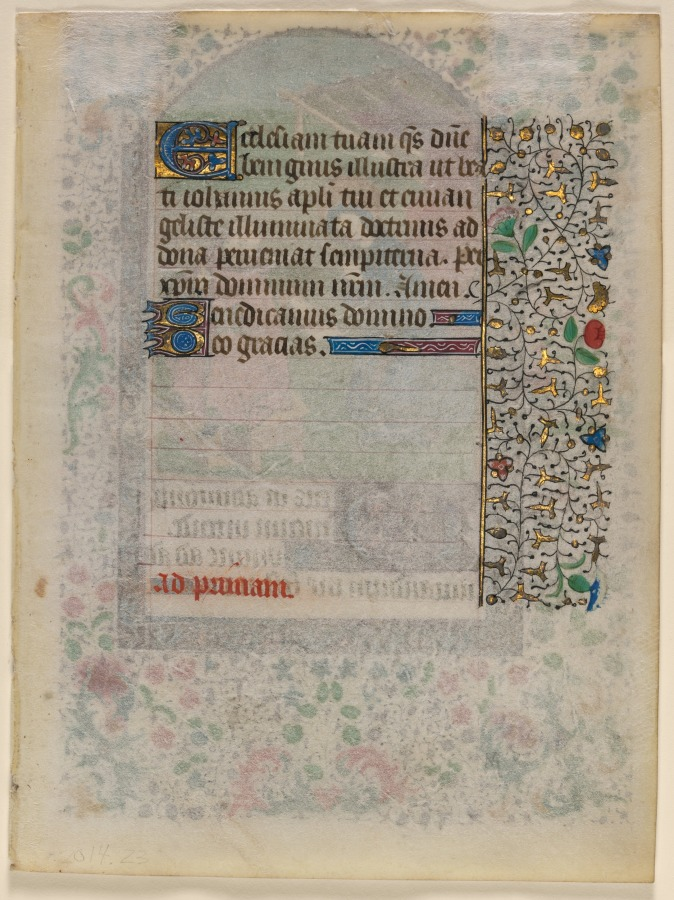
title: Leaf from a Book of Hours: The Nativity (recto) and Text (verso)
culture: Northeastern France, 15th century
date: c. 1430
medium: ink, tempera, and gold on vellum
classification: Manuscript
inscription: Deus in adiutorium meum intende. Domine, ad adiuvandum me festina.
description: Representing God's entry into the world, the Nativity remains one of medieval painting's most poignant Christian images. In the Gospels, only Matthew and Luke directly described this event. Perhaps the brevity and absence of detail in these texts allowed artists to devote so much creativity to amplifying the Christmas story. This miniature's simplicity makes it compelling. Only the three principals—Mary, Joseph, and the newly born Christ child—appear in the scene. The Virgin kneels before an elegant canopied bed made sumptuous by a richly embroidered textile, which stands in contrast to the nearby rustic fence and receding landscape. This scene probably follows the mystical visions of Saint Bridget of Sweden who visited Bethlehem in 1370, and whose written accounts circulated widely after her canonization in 1391: "When her time came she took off her shoes and her white cloak and undid her veil. . . . Then she made ready the swaddling clothes which she put down beside her. When all was ready she bent her knees and began to pray. While she was thus praying with hands raised the child was suddenly born, surrounded by a light so bright that it completely eclipsed Joseph's feeble candle."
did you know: Books of hours were devotional books popular in the Middle Age, meant for laypeople, or those not in the clergy. They were used at home and contained daily prayers as well as prayers for specific occasions, such as death, plague, warfare, travel, or bad weather.